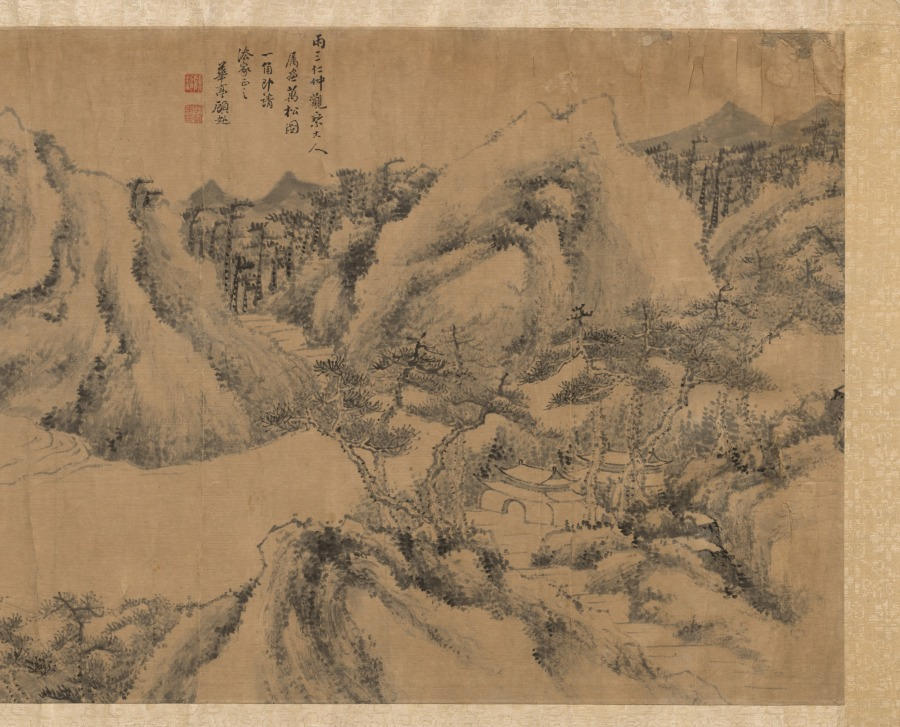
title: Pine-shaded Monastery on a Cloudy Mountain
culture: China, Qing dynasty (1644-1911)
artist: Gu Chao (Chinese, active late 1700s)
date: late 1700s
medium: handscroll, ink and slight color on paper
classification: Painting